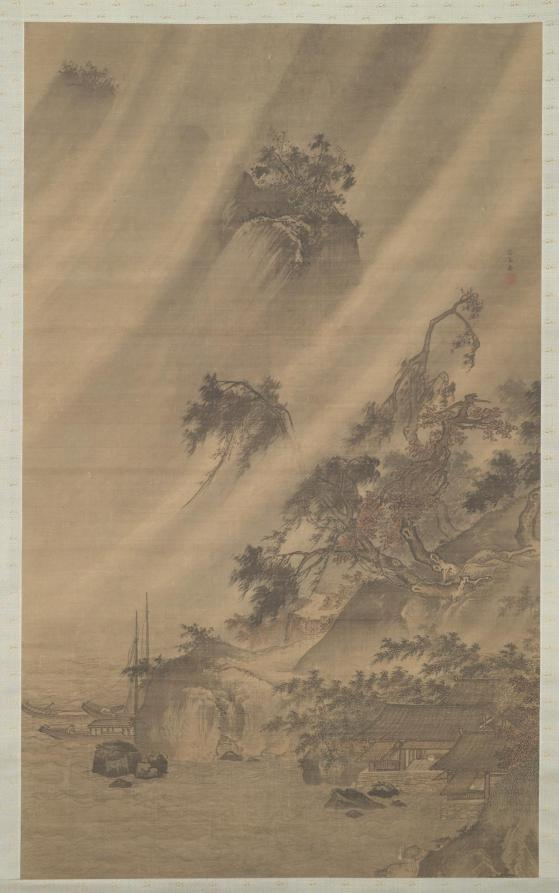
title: River Village in a Rainstorm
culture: China, Ming dynasty (1368–1644)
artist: Lu Wenying (Chinese)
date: c. 1480–1507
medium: Hanging scroll; ink and slight color on silk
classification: Painting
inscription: 呂文英 [印] 日近清光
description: In this scene, windswept rain pelting a village captures the power of nature in a masterful composition. Lü Wenying from Zhejiang served as a court painter during the Hongzhi era (1488–1505). Hardly known, with few remaining works, he is considered a Zhe school painter who followed the style of the Southern Song academy. Zhe school painters, named after the province of Zhejiang, transformed the poetic scenery of the Southern Song artists into dramatic, large-scale views. Active in the same region with frequent monsoon rains in the summer season, artists were familiar with outbreaks of rain and storms.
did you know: A young boy peeks out a window perhaps viewing the two people struggling through the rain.